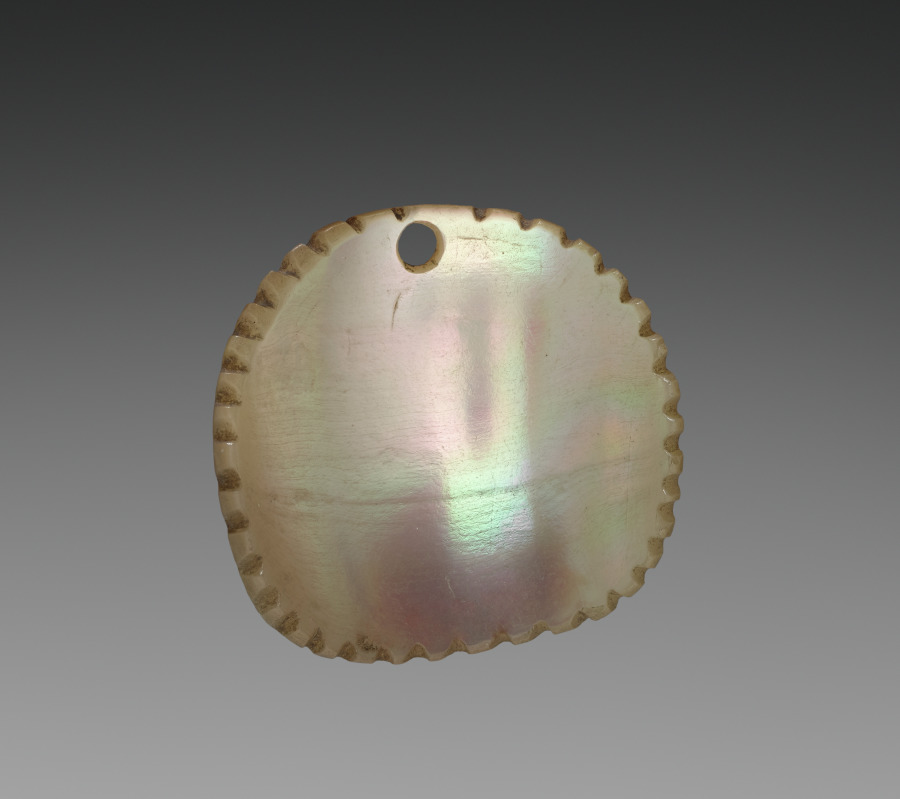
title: Earring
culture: probably Malacian or South Sea Islands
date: before 1916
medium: mother-of-pearl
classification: Jewelry